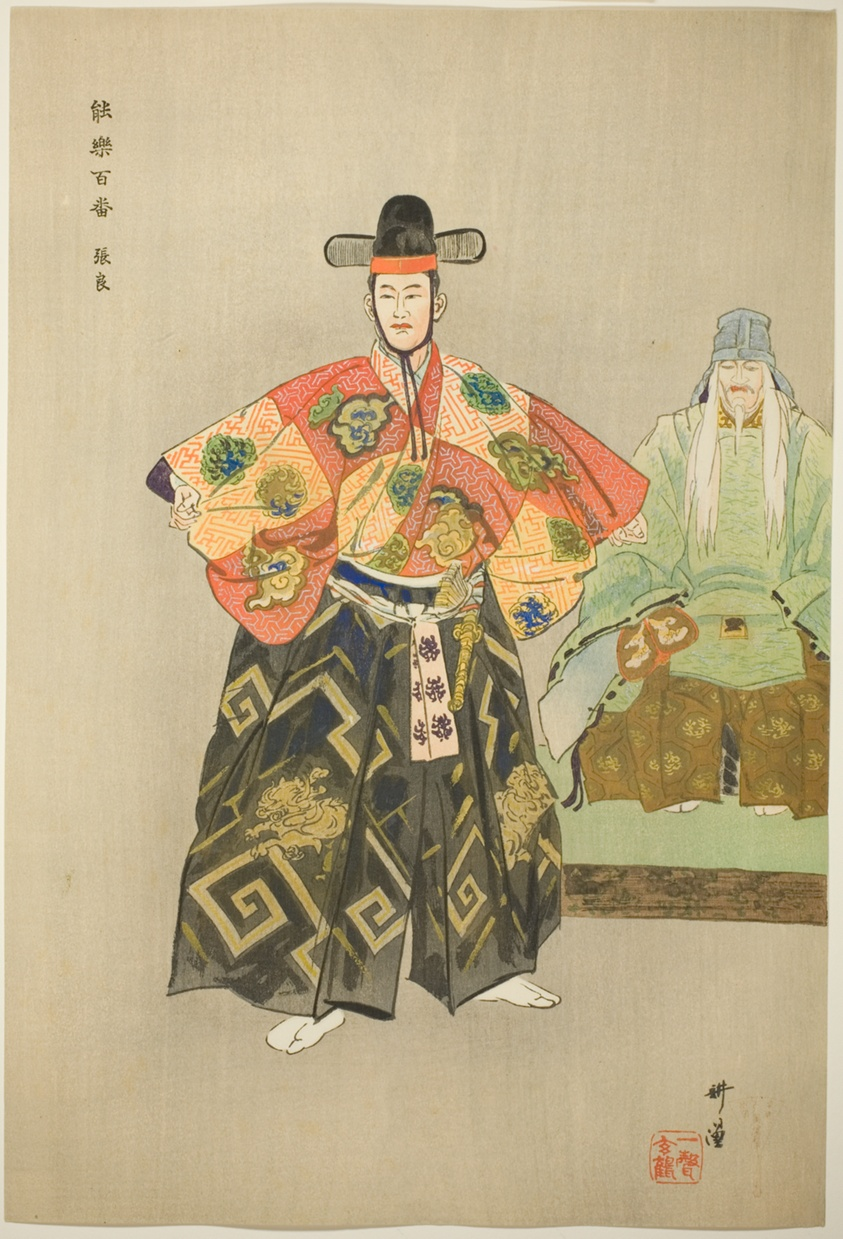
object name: Print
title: Cho Ryo, from the series "One Hundred No Dramas (Nogaku hyakuban)"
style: Japanese (culture or style)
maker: Tsukioka Kogyo; Japanese, 1869-1927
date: 1898/1903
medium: Color woodblock print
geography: Japan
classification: woodblock print; print; asian art